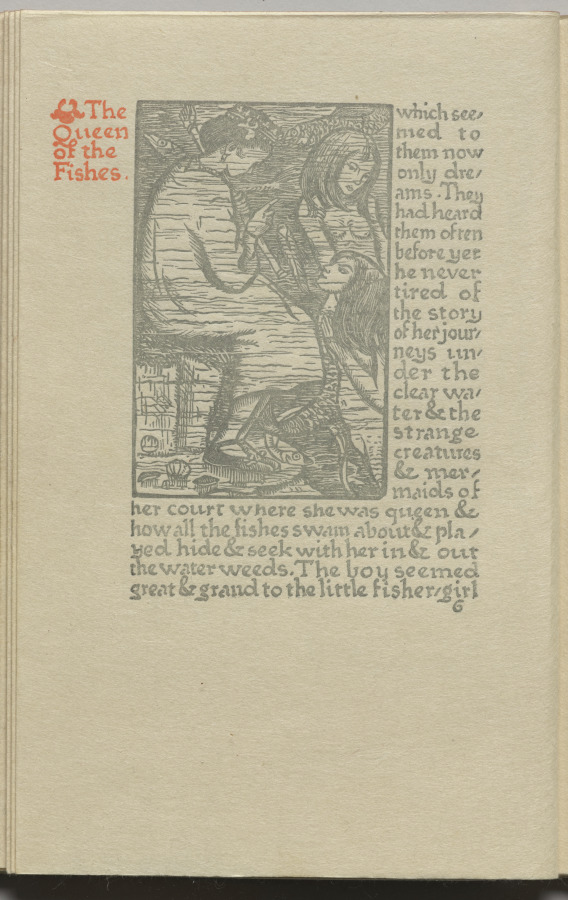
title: The Queen of the Fishes: Plate 6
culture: England, 19th century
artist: Lucien Pissarro (British, 1863–1944)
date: 1894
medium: color woodcut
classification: Bound Volume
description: Pissarro, son of the French Impressionist artist Camille Pissarro, moved to England in 1890. By 1894 he and his wife, Esther Bensusan Pissarro, had bought a printing press and established the Eragny Press. Influenced by William Morris, they were involved in every step of the production process: designing, cutting the woodblocks, setting type, and printing. The first book published by Ergany Press, The Queen of the Fishes, is based on an old fairy tale in which a peasant boy and girl escape the hardships of their lives by fantasizing that they have been turned into a giant oak and a splendid fish, respectively.